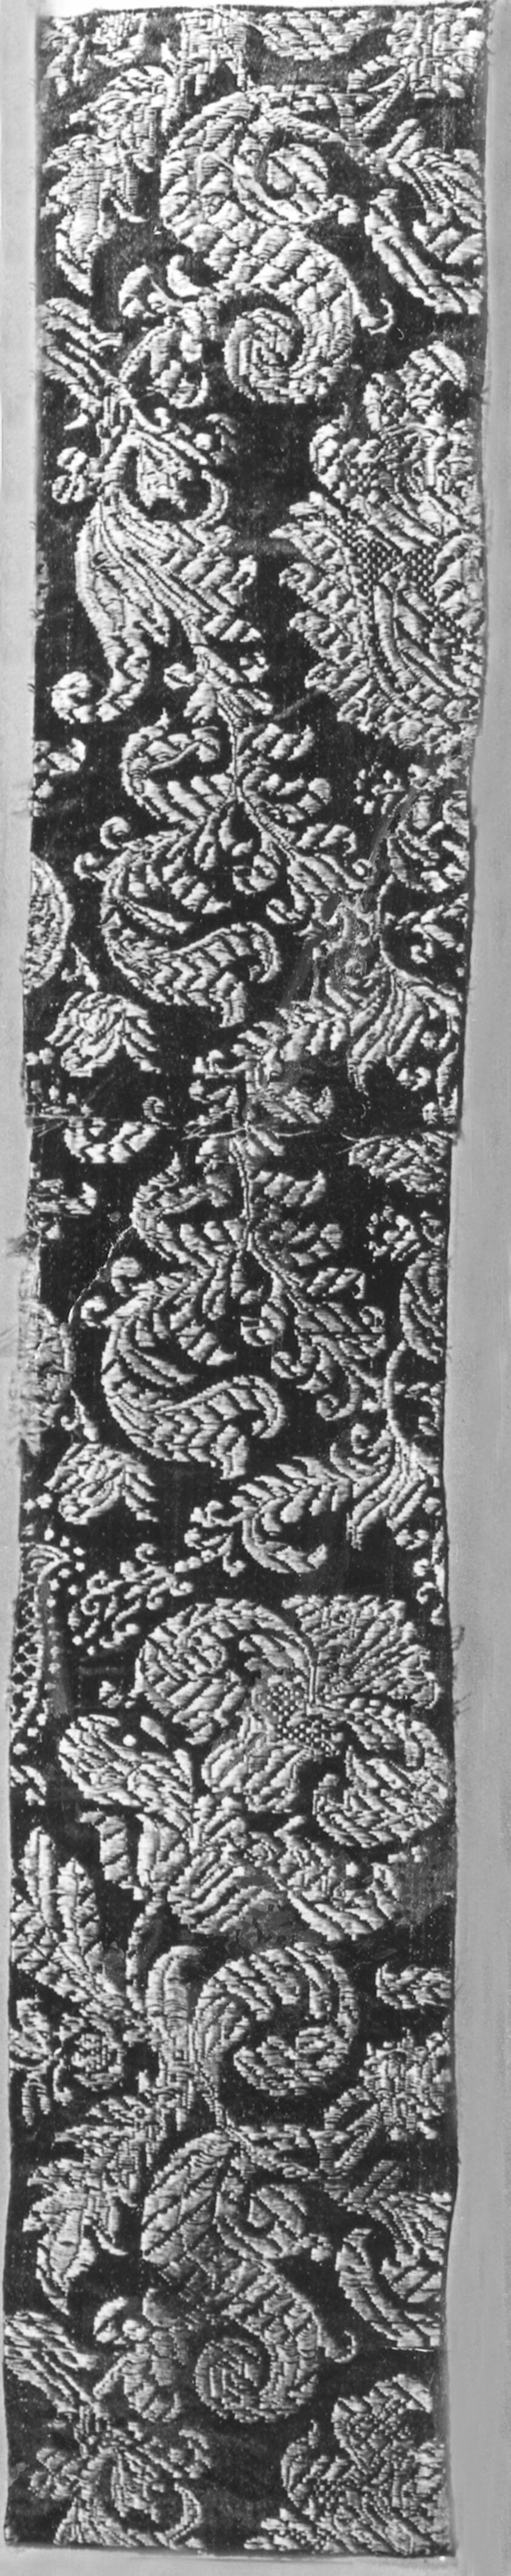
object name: Textile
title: Fragment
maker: France or Italy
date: Mid–17th century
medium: silk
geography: France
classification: textile; weaving